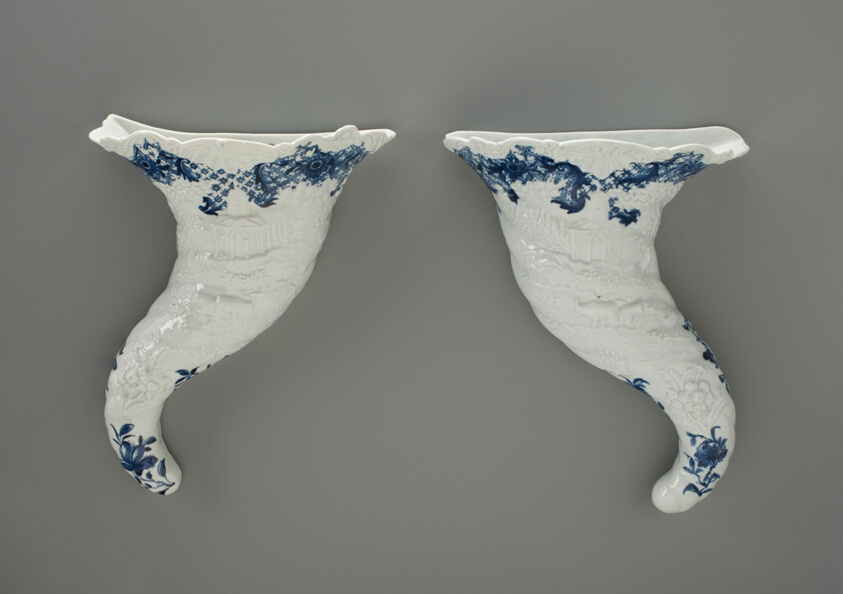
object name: Ceramics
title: Wall Pocket (one of a pair)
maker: Worcester Porcelain Factory (Warmstry House Period, 1751–1783); Worcester, England, founded 1751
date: c. 1756–1758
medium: Soft-paste porcelain, underglaze blue decoration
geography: Worcester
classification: porcelain; ceramics; european decorative arts